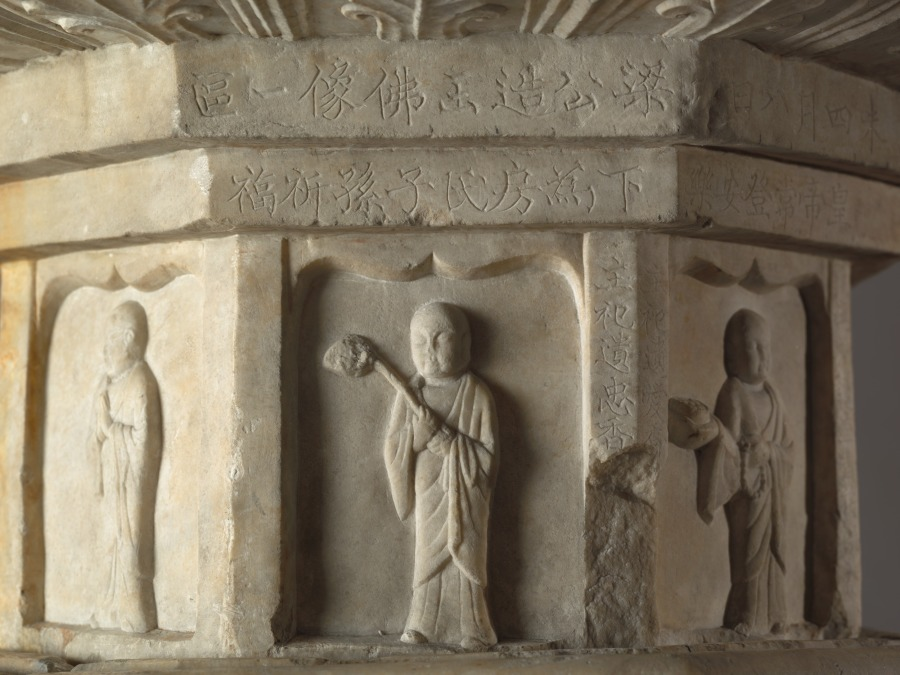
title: Fang Xuanling Pedestal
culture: China, Tang dynasty (618-907)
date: 647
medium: marble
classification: Sculpture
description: This double lotus pedestal exhibits the rich, ornate style of early Tang sculpture. It was commissioned by the Duke of Liang, Fang Xuanling (578–648), for the blessing of his second son and daughter-in-law, the Tang imperial princess of Gaoyang. The iconography and inscription suggest that it originally went with a statue, now missing, of Shakyamuni, the historical Buddha, instead of Amitayus. Today the pedestal is topped with Amitayus, the Buddha of Infinite Life, seated in meditation. Although the pedestal was not made with the statue, the combination is faithful to the original artistic conception.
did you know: In front, the top layer of the pedestal has an abstract curvilinear motif suggesting drapery; the rear is carved with a flower-and-leaf motif.